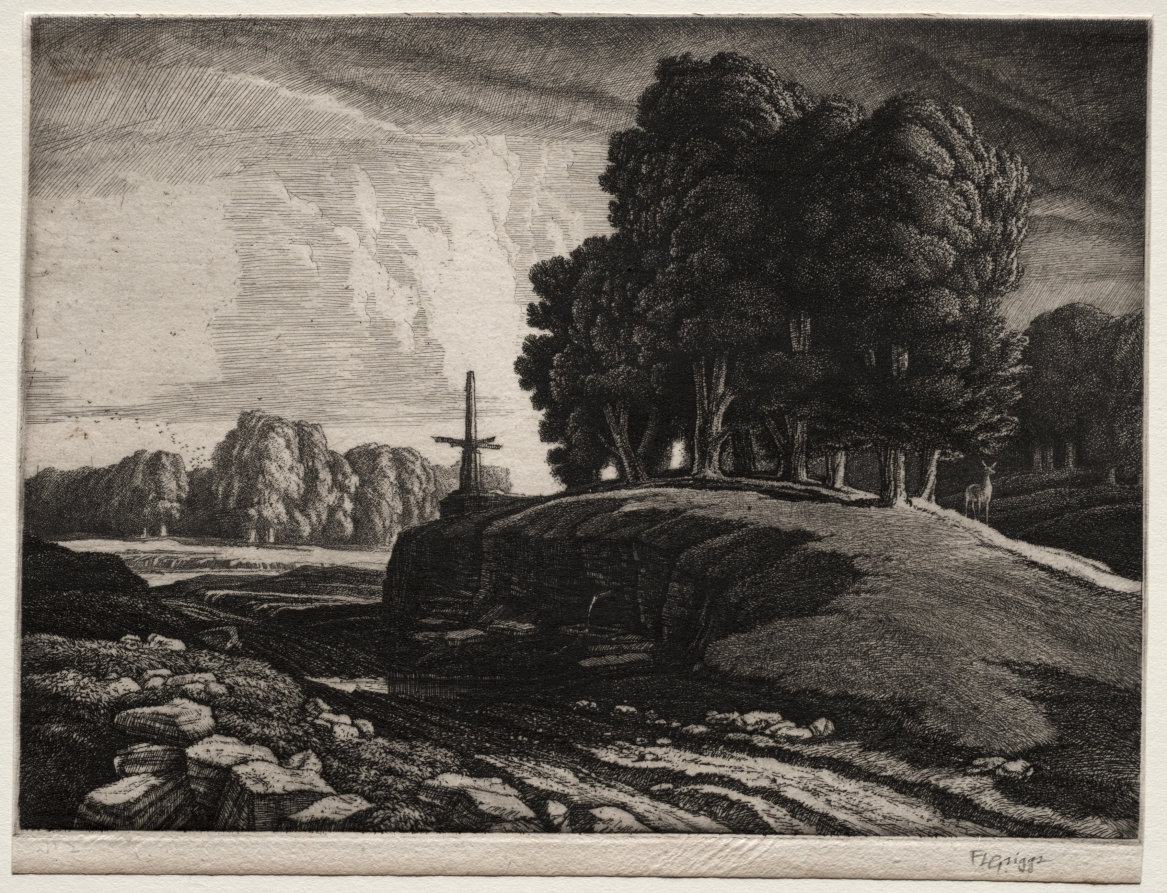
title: The Cross Hands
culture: England, 20th century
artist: Frederick Landseer Maur Griggs (British, 1876–1938)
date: 1933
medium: etching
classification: Print